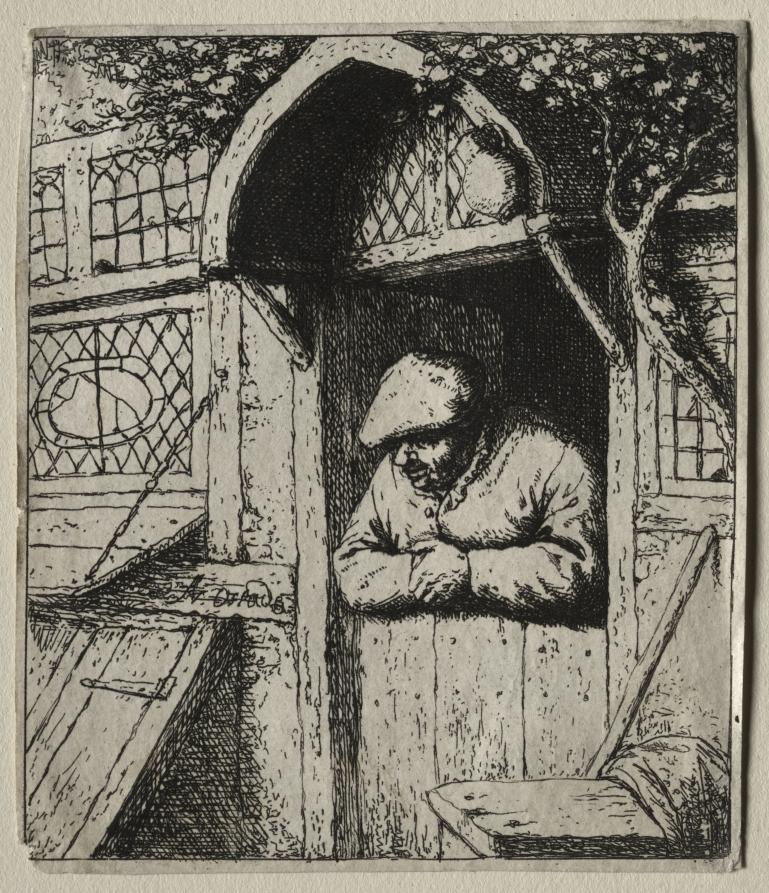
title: Peasant Leaning on His Doorway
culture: Netherlands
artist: Adriaen van Ostade (Dutch, 1610–1684)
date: c. 1653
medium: etching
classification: Print